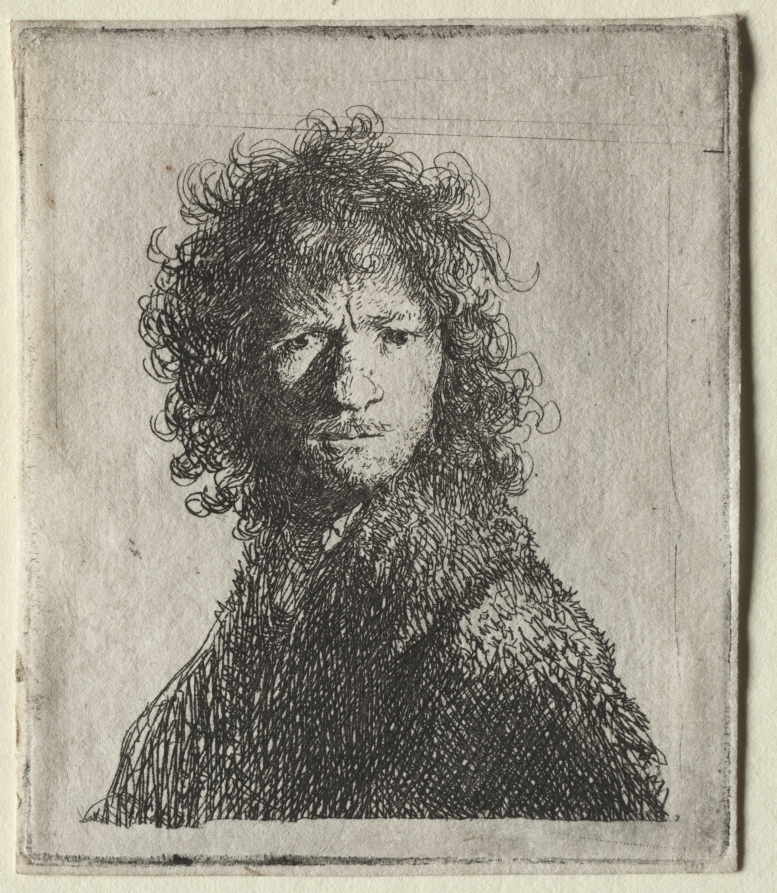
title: Self-Portrait Frowning: Bust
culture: Netherlands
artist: Rembrandt van Rijn (Dutch, 1606–1669)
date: 1630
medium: etching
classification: Print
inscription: VERSO. center left, in graphite: 29 15 3 11[arranged in a circle, listed clockwise] ; lower left, in graphite (inside collector's mark): S.C. ; lower left, in graphite: B. 10 ; lower left, in graphite: A69774/28 ; lower center, in graphite: 2[circled] ; lower center, in graphite: [a triangle] ; lower right, in graphite: 138